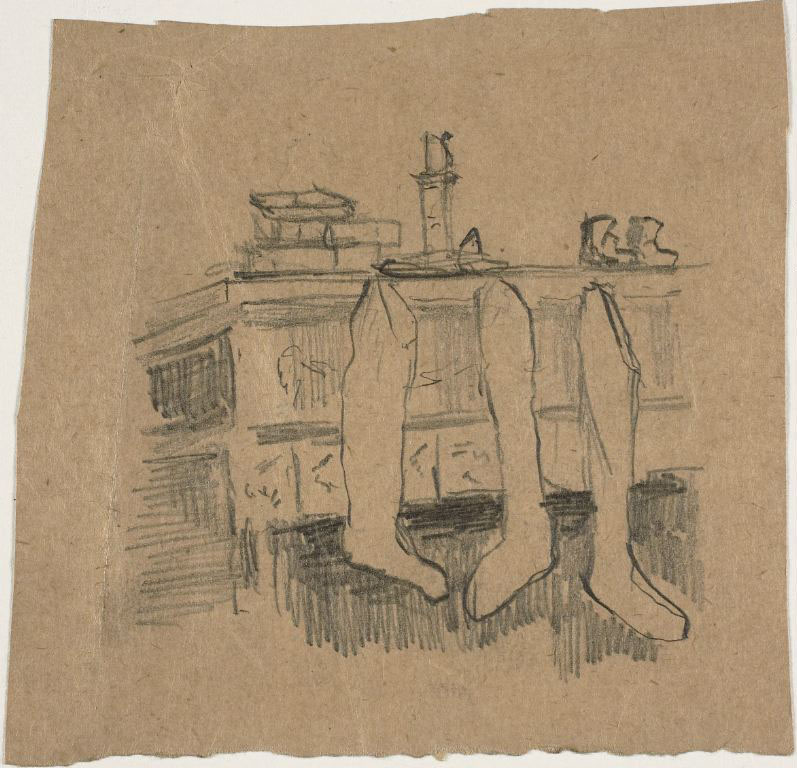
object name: Drawing and Watercolor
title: Christmas Stockings Hanging Over the Fireplace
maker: William Michael Harnett (American, born Ireland, 1848-1892)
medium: Graphite on tan wove paper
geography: United States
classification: graphite; drawings (visual works); prints and drawing